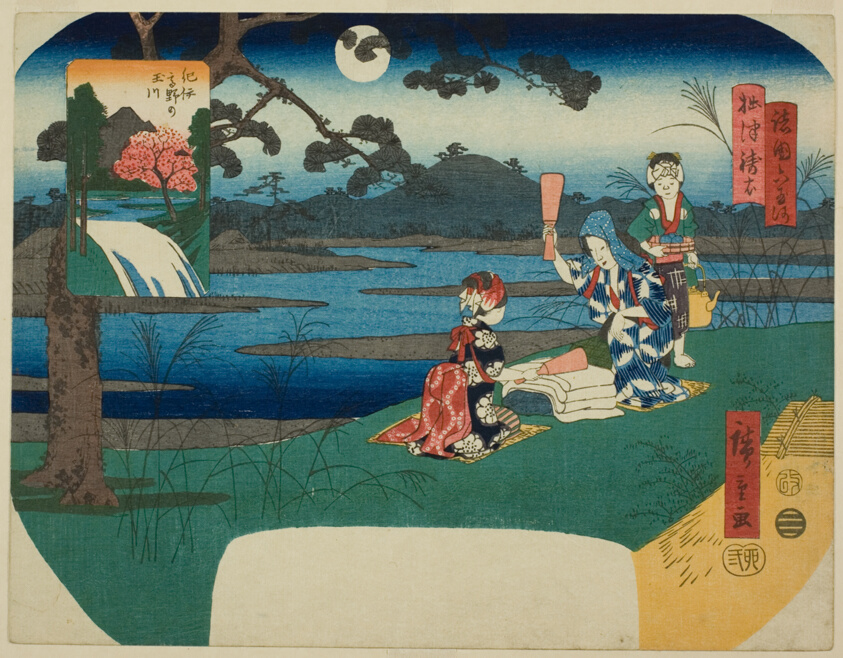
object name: Print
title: The Toi Jewel River in Settsu Province (Settsu Toi) and the Koya Jewel River in Kii Province (Kii Koya no Tamagawa), from the series "Six Jewel Rivers in Various Provinces (Shokoku Mu Tamagawa)"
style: Japanese (culture or style)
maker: Utagawa Hiroshige 歌川 広重; Japanese, 1797-1858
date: 1855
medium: Color woodblock print; uchiwa-e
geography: Japan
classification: woodblock print; print; asian art